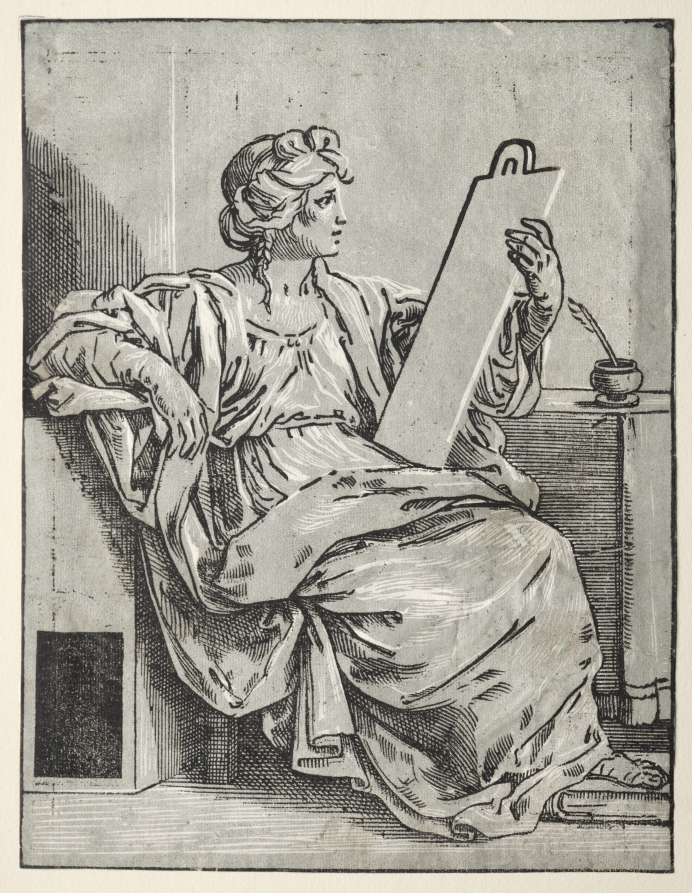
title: A Sibyl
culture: Italy, 17th century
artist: Bartolommeo Coriolano (Italian)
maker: after Guido Reni (Italian, 1575–1642)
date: 1640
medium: chiaroscuro woodcut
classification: Print